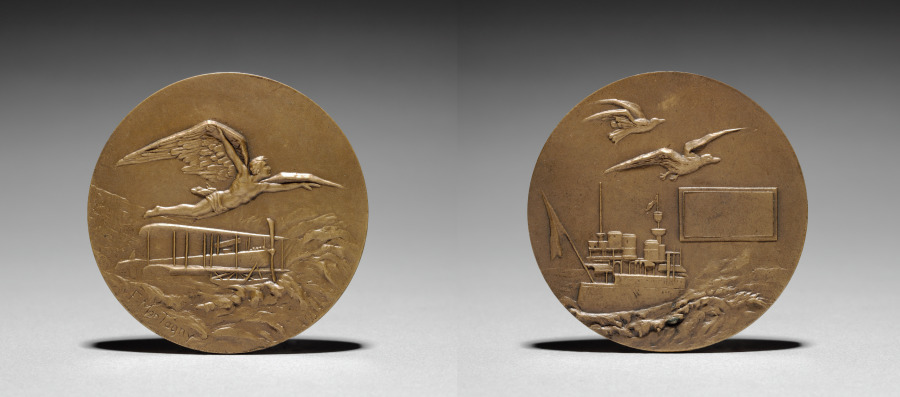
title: Medallion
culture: France, 19th century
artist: F. Montagny (French)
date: c. 1921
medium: bronze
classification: Metalwork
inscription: signed: "F. Montagny."